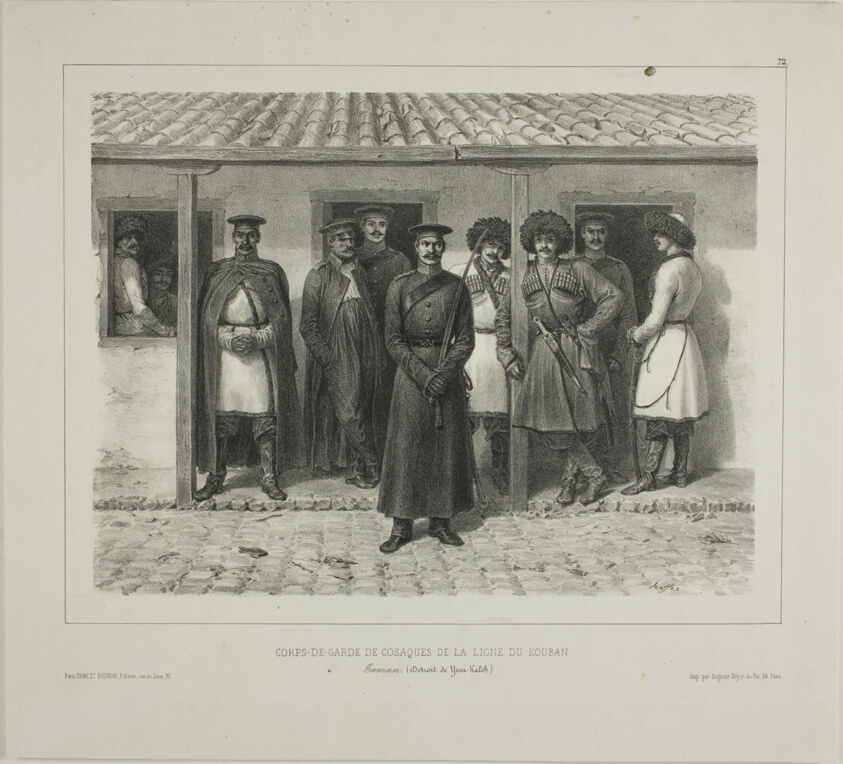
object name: Print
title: Cossack Bodyguards of the Line, Kuban, Taman, Détroit de Yéni-Kaleb, October 9, 1837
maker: Denis Auguste Marie Raffet (French, 1804-1860); printed by Auguste Bry (French, 19th century); published by Éditeur Ernest Bourdin (French, active 19th century)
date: 1846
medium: Lithograph in black on ivory wove chine laid down on ivory wove paper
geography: France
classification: lithograph; print; prints and drawing